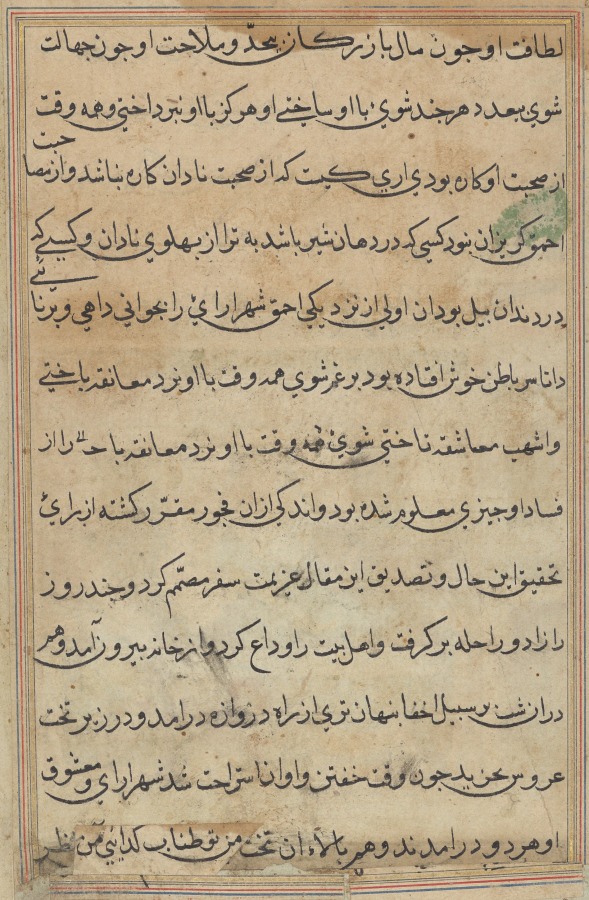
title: Page from Tales of a Parrot (Tuti-nama): text page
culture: Mughal India, court of Akbar (reigned 1556–1605)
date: c. 1560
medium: gum tempera, ink, and gold on paper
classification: Painting